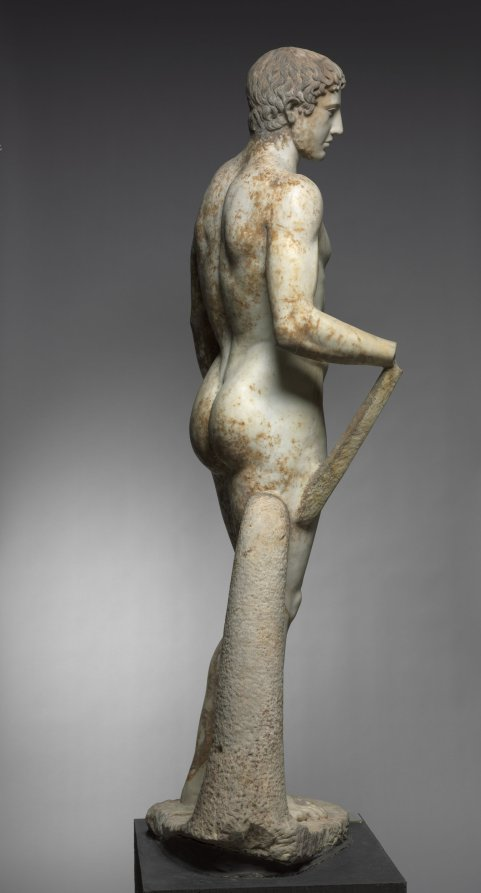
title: Statue of an Athlete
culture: Italy, Roman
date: 1–100 CE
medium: marble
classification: Sculpture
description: This idealized athlete recalls Greek sculptural types invented and popularized during the 400s BC. Large-scale athletes and other sculptures like this were originally created by famous artists as sanctuary dedications. Centuries later, they were widely copied and adapted by Roman sculptors, whose clients sought their own versions of earlier masterpieces. Working in marble rather than bronze, these sculptors added certain elements for stability, such as the struts and the large tree trunk beside the right leg here. Sculptures like this one are profoundly complex, made by and for Romans but descended from Greek ancestors.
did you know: For many years, this sculpture stood in the rotunda of the Cleveland Museum of Art.